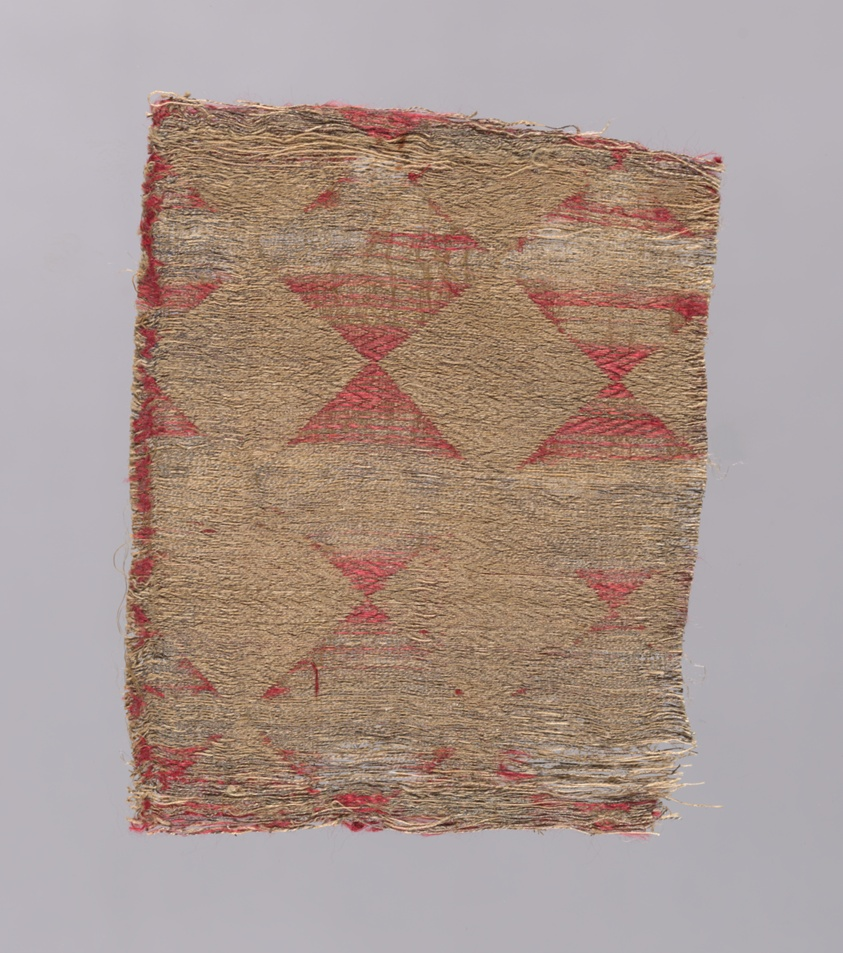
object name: Textile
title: Fragment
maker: Spain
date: 13th/14th century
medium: Silk and gilt-animal-substrate-wrapped linen, warp-float face of weft chevron twill weave of two color complementary wefts and inner warps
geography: Italy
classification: textile; weaving